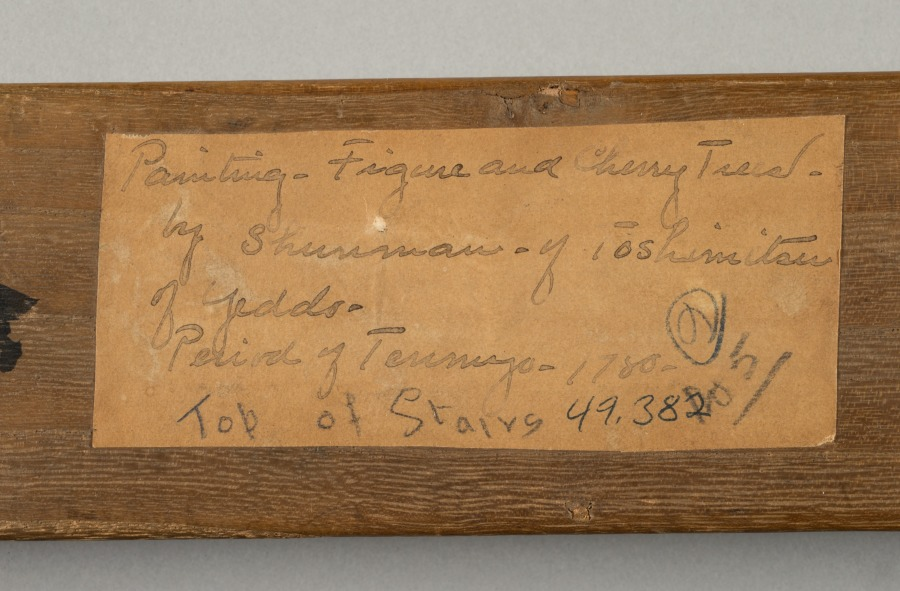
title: Woman and Two Children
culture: Japan, Meiji period (1868–1912)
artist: copy after Kubo Shunman (Japanese, 1757–1820)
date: early 1900s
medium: hanging scroll; color and gold on silk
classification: Painting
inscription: signed Kubo Shunman